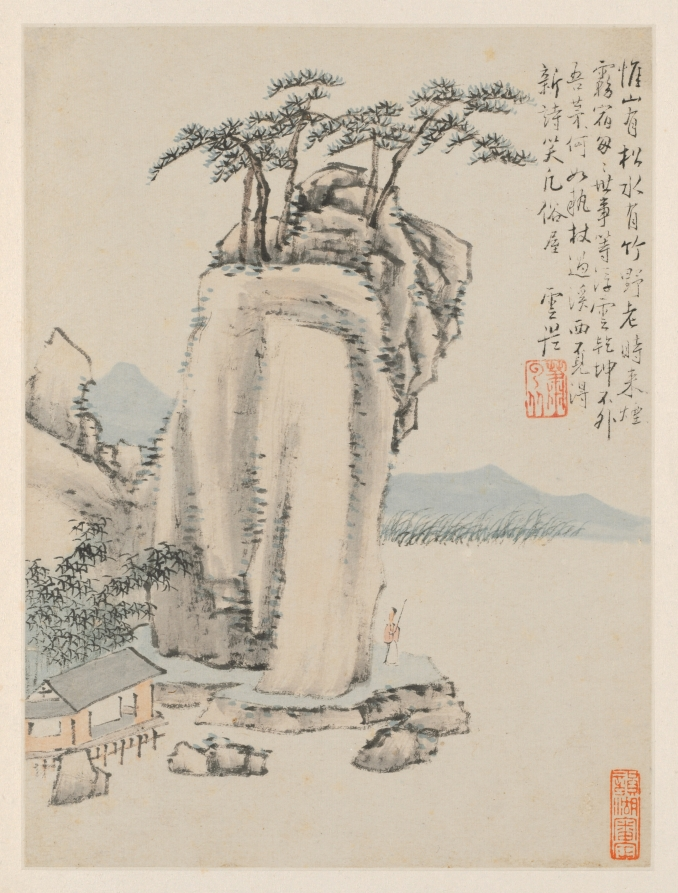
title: Album of Seasonal Landscapes, Leaf G (previous leaf 7)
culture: China, Qing dynasty (1644-1911)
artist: Xiao Yuncong (Chinese, 1596–1673)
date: 1668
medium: album leaf; ink and light color on paper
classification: Painting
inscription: Artist's inscription, signature, and 8 seals: Leaf G. Only at the mountain top are there pines, at the water's edge, bamboo./ Old men from the country often come here to spend the night in the fog./ The hectic pace of worldly affairs is no more to me than drifting clouds;/ My universe does not extend beyond my thatched hut./ What could be better than to grab a walking stick and head to the west of the river,/ Striving to write a new poem that will tease the common crowd. Yuncong [seal] Xiao Yuncong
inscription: 9 additional seals: 2 of Chen Yixi 陳奕禧 (1646-1709); 4 of Li Yufen 李玉棻 [Li Yunhu 李韵湖] (active mid-1800s); 3 unidentified.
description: Throughout his lifetime, Xiao Yuncong visited Nanjing and Yangzhou, cities embedded in the fertile and water-rich Jiangnan region, as reflected in his paintings. Xiao painted from nature, and his landscapes are informed by the seasons and his travels, as well as by his experience as a print designer. Xiao’s fresh, light colors continue to appear in later Shanghai school paintings. This album was formerly in the collection of Li Yufen in Yangzhou and then owned by Wu Hufan in Shanghai. While the artist impressed his seal consistently below his poetic inscriptions in the upper parts of the composition, the red seals on the margins and in the lower corners of the paintings are impressions by the album’s previous owners.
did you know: The season depicted in this leaf is ambiguous, but the presence of bamboo and pine (two of the "three friends" 歲寒三友) points to winter.